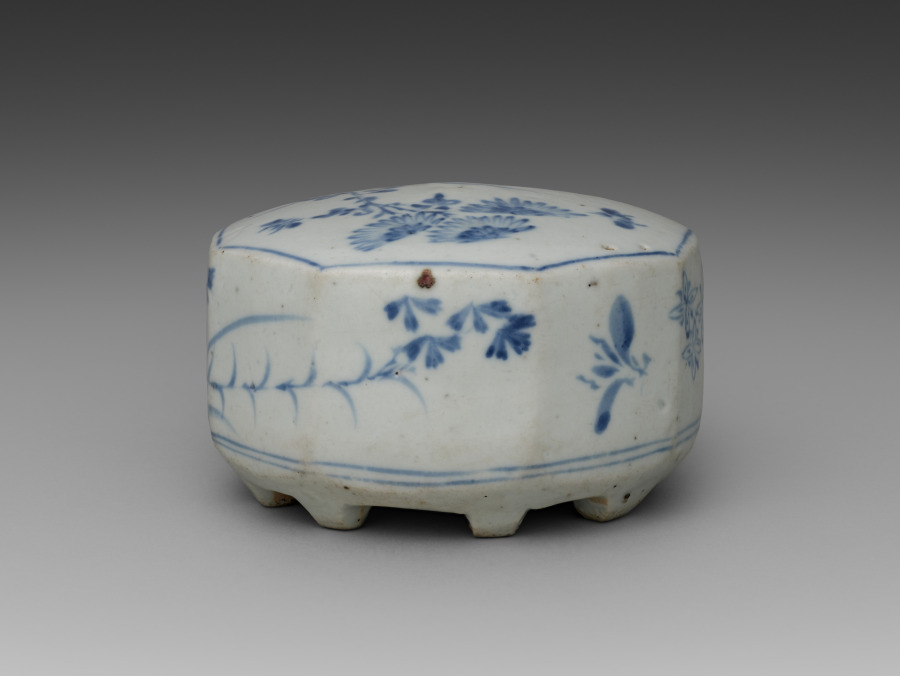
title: Octagonal Water Dropper Decorated with Flower Design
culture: Korea, Joseon dynasty (1392–1910)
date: late 1700s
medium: Porcelain with blue and white decoration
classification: Ceramic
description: A water dropper was an essential utensil for a literati man of the Joseon dynasty (1392–1910) in writing calligraphy. It was used to add water, by small drops, to an inkstone while grinding an ink stick. This work has a small spout in the shape of a cicada. This decorative element not only adds a sense of whimsical sensibility to this scholarly utensil, but also aims to symbolize the aspiration for scholarly achievement—as loud as the cicada’s song.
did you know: A small spout in the shape of a cicada is placed on one of the octagonal sides. This decorative element not only adds a sense of whimsical aesthetic sensibility to this scholarly utensil, but also aims to symbolize the aspiration for scholarly achievement—as loud as the cicada’s song.